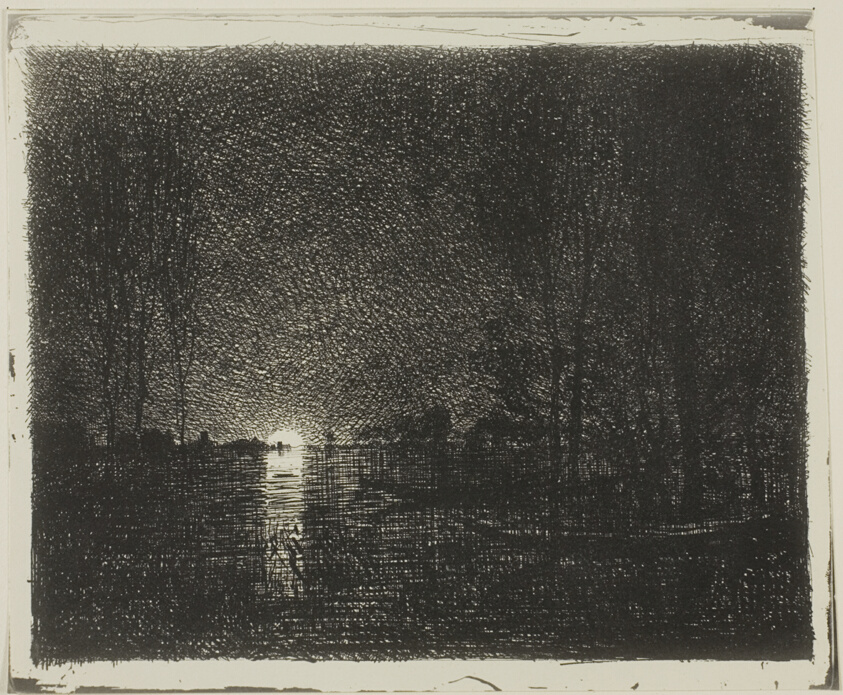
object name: Print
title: Night Effect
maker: Charles François Daubigny (French, 1817-1878)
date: 1862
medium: Cliché-verre on ivory photographic paper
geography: France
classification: cliché-verre; print; prints and drawing